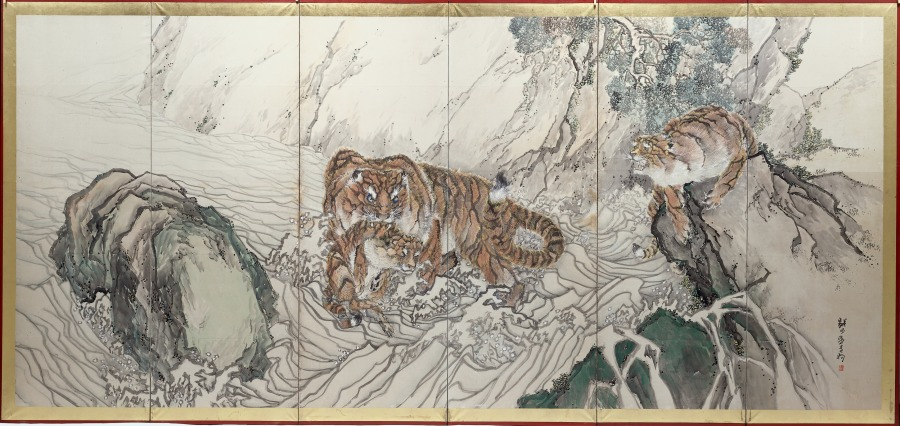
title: Tiger Family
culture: Japan, Edo period (1615–1868)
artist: Kishi Ganku (Japanese, 1749/56–1838)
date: early 1800s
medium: Pair of six-panel folding screens; ink and color on paper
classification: Painting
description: By the time this self-taught painter reached his thirties, his paintings were keenly sought after by Kyoto’s sophisticated patrons, including members of the imperial family. Judging from the surviving works, his supporters delighted in the colorful, auspicious imagery of Chinese historical figures, blossoming plum trees, cranes, peacocks, roosters, and especially tigers. Kishi Ganku was originally from the coastal town of Kanazawa, but relocated to Kyoto to work for the Arisugawa family. His work incorporates stylistic elements from the Kano school, the Maruyama school, and works by the Chinese artist Shen Nanping (1682–1760).